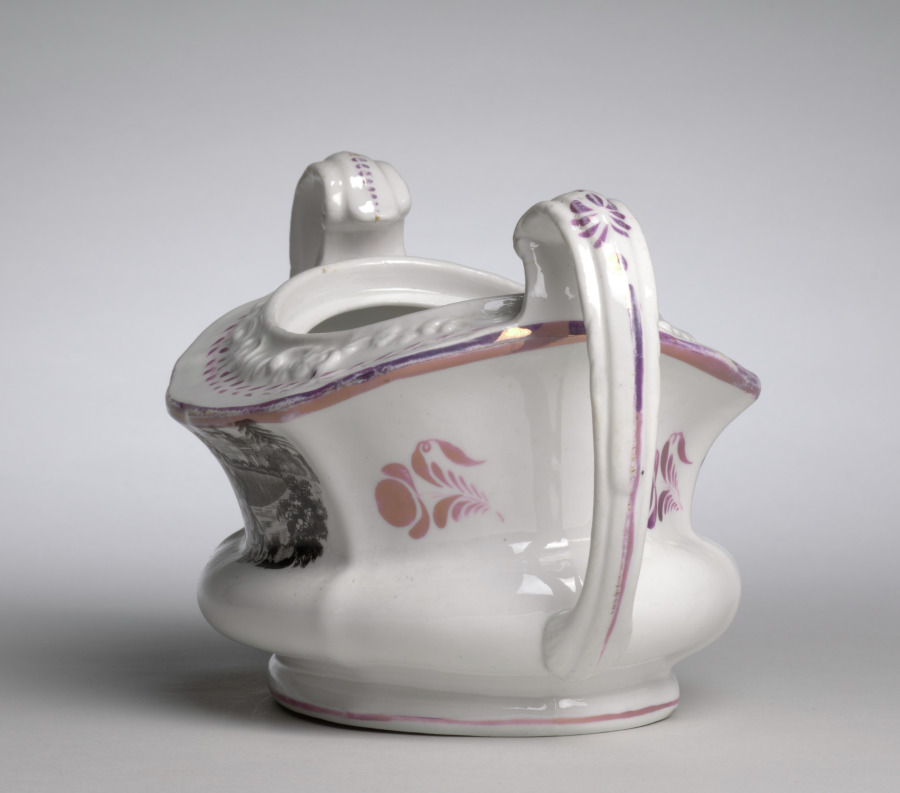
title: Sugar Bowl and Lid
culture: England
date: c. 1800–1825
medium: earthenware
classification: Ceramic